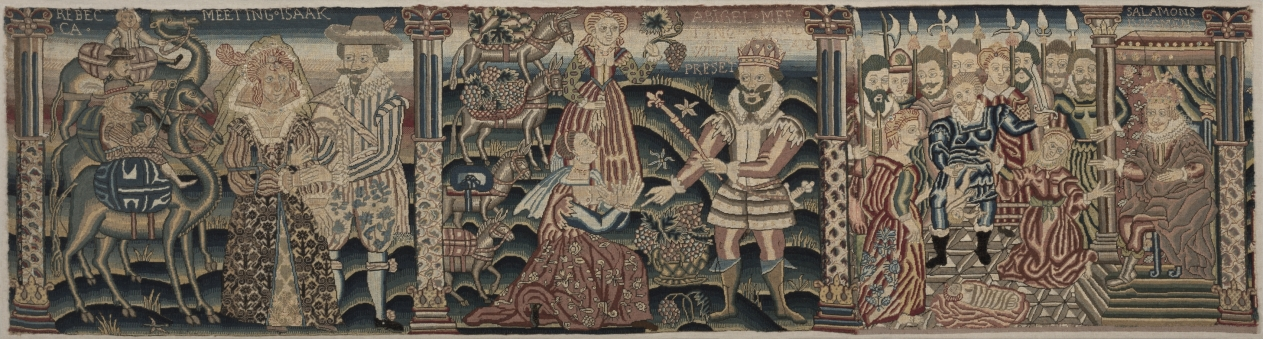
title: Section of an Embroidered Frieze: Rebecca Meeting Isaac, Abigail Meeting David with a Present, The Judgment of Solomon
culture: England, Period of Charles I (1625-1649), 17th century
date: 1625–1649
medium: petit-point embroidery; wool and silk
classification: Embroidery